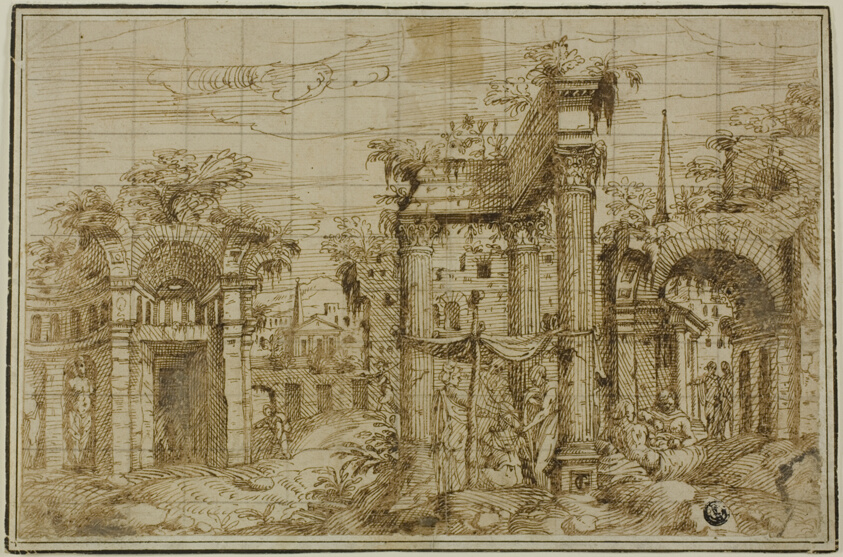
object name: Drawing and Watercolor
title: Ruins of Roman Forum, with Figures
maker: Giovanni Battista Pittoni the Elder, called Battista Vicentino; Italian, 1520-1583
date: c. 1550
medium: Pen and brown ink on buff laid paper, squared in graphite, laid down on ivory laid paper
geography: Italy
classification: pen and ink drawings; drawings (visual works); prints and drawing